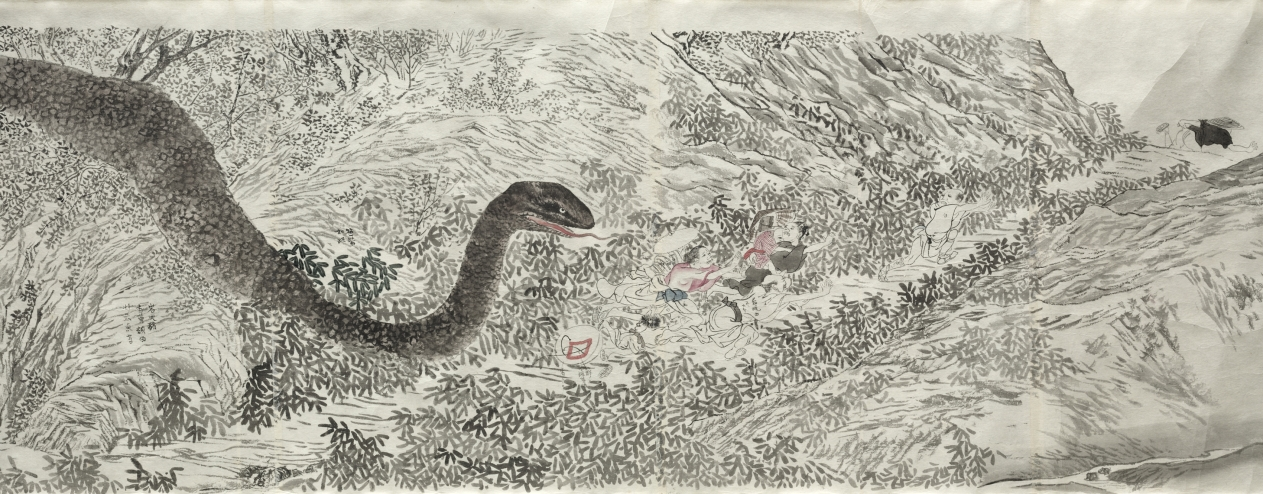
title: Sketch Copy of Natural Disasters, from the Seven Fortunes and Misfortunes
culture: Japan, Edo period (1615–1868) to Meiji period (1868–1912)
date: after 1773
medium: handscroll; ink and color on paper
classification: Painting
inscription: Signed: Gettcho; dated 1773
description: This unmounted handscroll is a copy of the first of a three-scroll set painted by Maruyama Ōkyo (1733–1795) for Buddhist monk Yujō (1723–1773). It depicts people's unfortunate encounters with forces of nature from wind to beasts. Ōkyo's realistic, contemporary imagery was meant to evoke a sense of recognition and empathy in viewers, shocking them into avoidance of possible punishments.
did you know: Notations that appear throughout the scroll indicate colors and other details of the original painting.